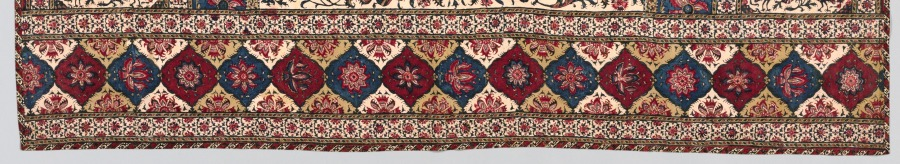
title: Chintz door curtain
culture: Iran, Isfahan, Qajar period (1779–1925)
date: 1800s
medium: Cotton: plain weave; chintz; hand drawing and block printing: bleach, mordant, and dye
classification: Textile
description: Lightweight white cotton cloth was transformed into this beautiful chintz, admired for its vibrant and durable colors, stunning pattern, fine quality, and rarity. Peacocks and a variety of birds appear amid vines with fanciful blossoms in the niche field and main border. Striking end borders feature blossoms in leaf-outlined diamonds on alternating ground colors of white, mustard, red, and blue. The complex chintz technique involving hand drawing, block printing, bleach, mordant, and dyes was developed in India. By the 1600s and 1700s, chintz was designed to target European and Asian markets and often featured large tree-of-life patterns. Chintz was also made in Iran by the 1400s, but this rare door curtain from the 1800s is among the oldest known examples.